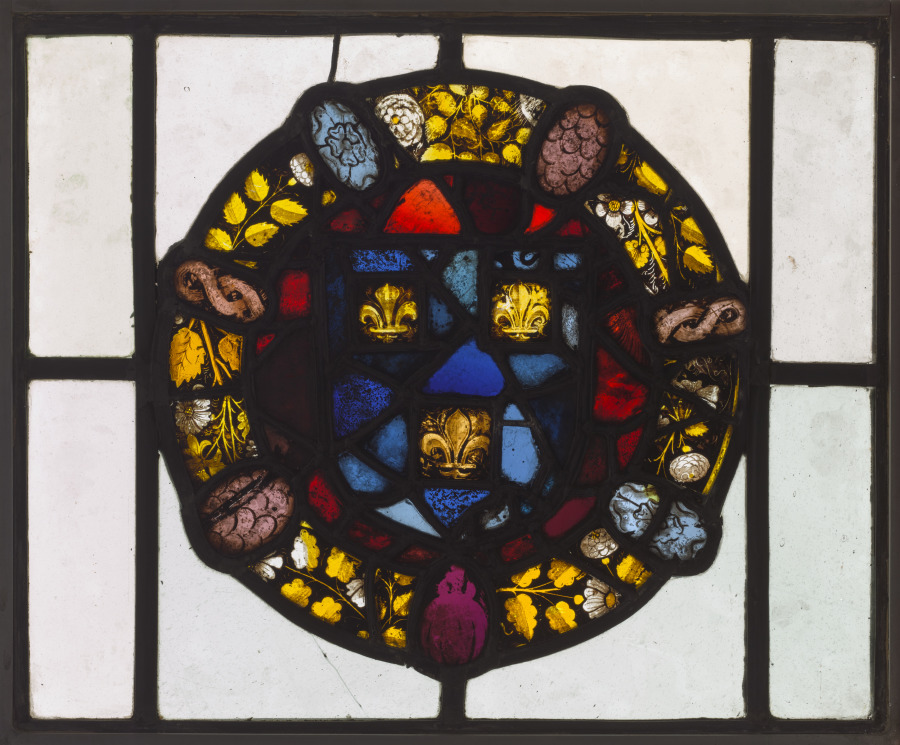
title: Panel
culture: England, 16th century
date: 1500s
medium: pot-metal and white glass, silver stain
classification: Glass